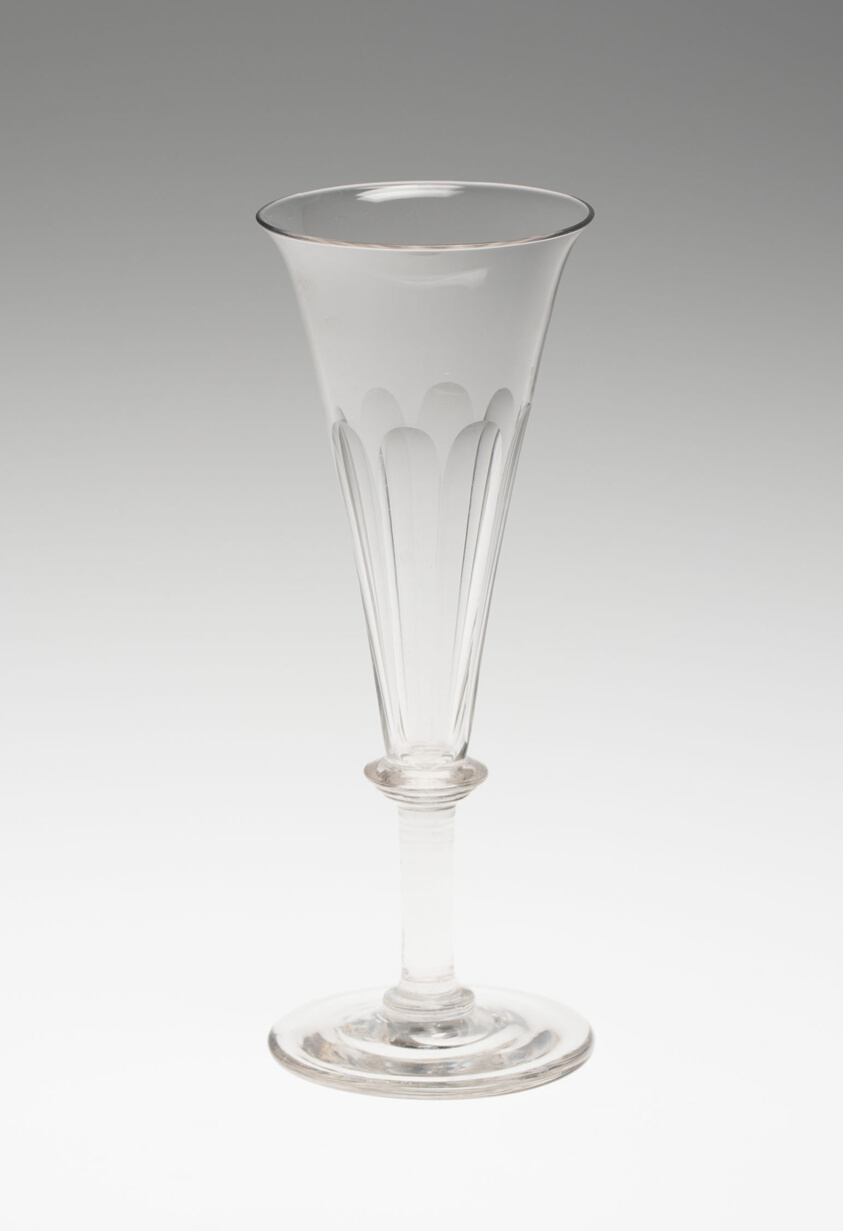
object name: Glass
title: Flute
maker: England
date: c. 1820/30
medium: Glass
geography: England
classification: glass